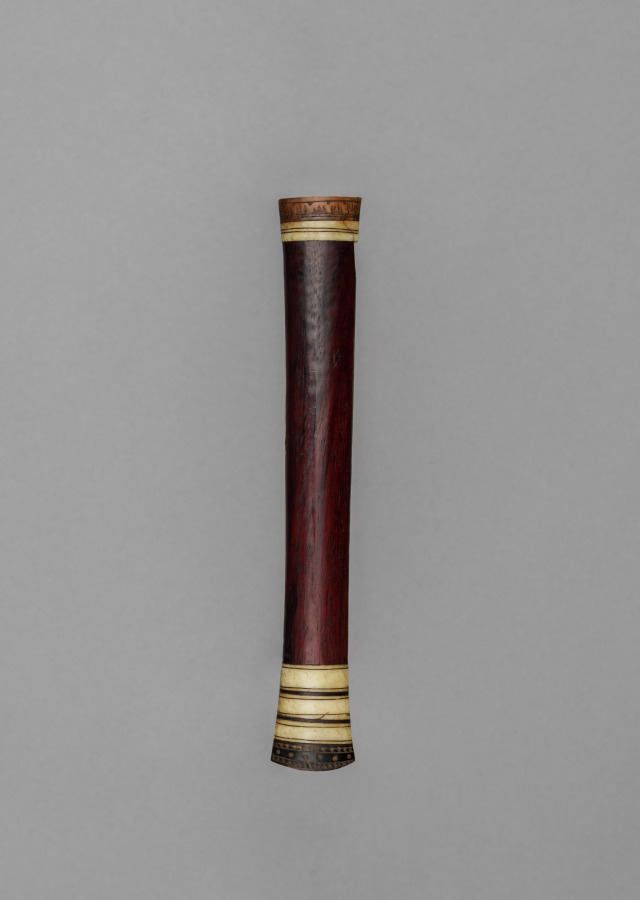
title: Scabbard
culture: Sumatra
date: before 1916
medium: Wood with bone or ivory, horn, and other inlays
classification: Arms and Armor